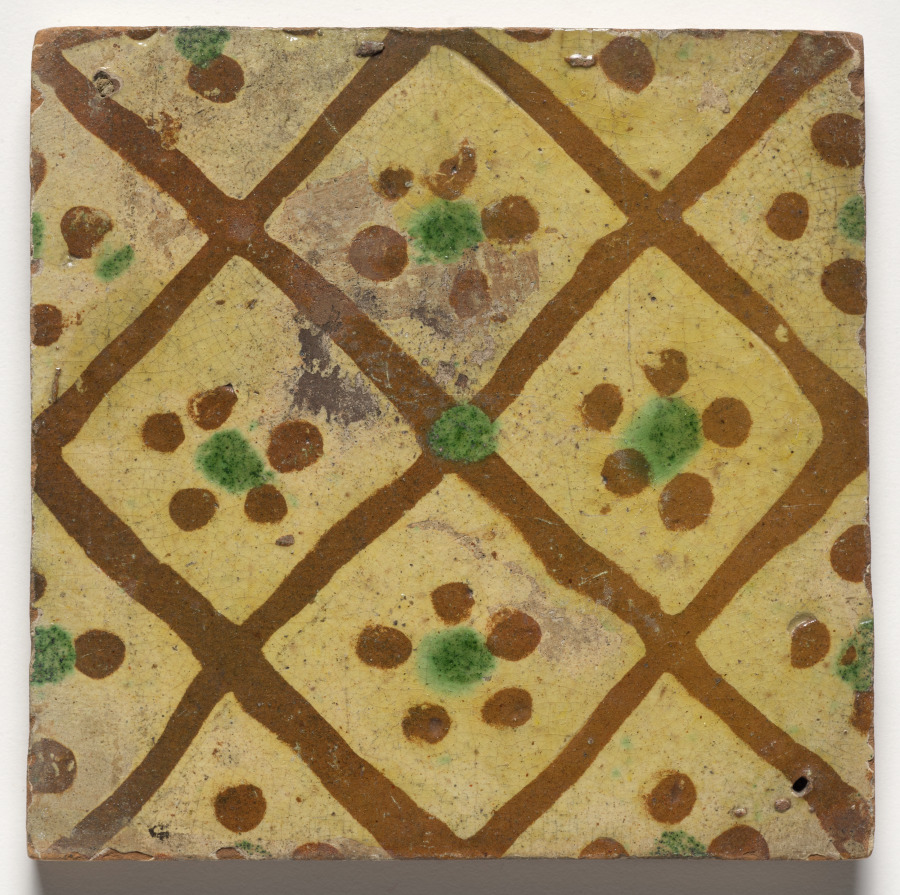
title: Tile- Diamond Interlace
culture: Netherlands, Holland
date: c. 1700s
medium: glazed ceramic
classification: Ceramic